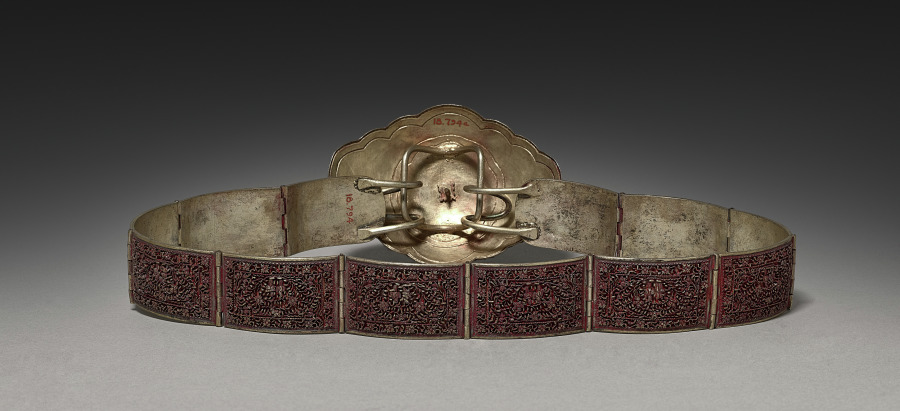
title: Belt with Buckle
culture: Siam, 19th century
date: 1800s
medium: brass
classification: Jewelry